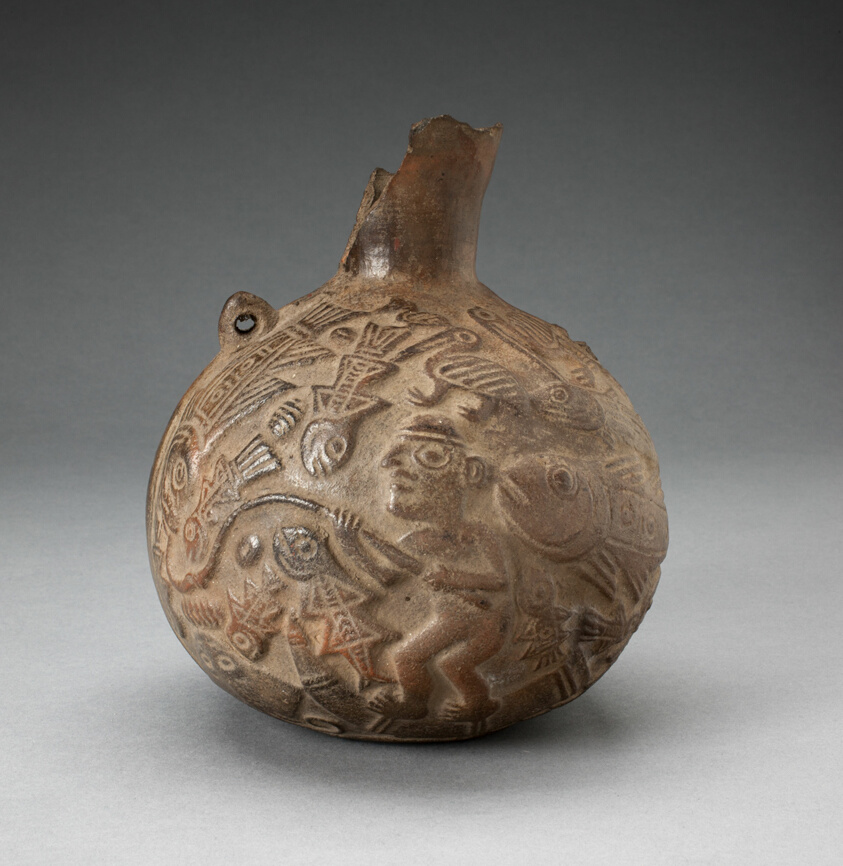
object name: Vessel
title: Jug with Relief Depicing Fishing Scene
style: moche, Arts of the Americas, andes, south american, andean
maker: Moche (Chimbote, Santa Valley, north coast, Peru)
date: 100 BCE–500 CE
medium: Ceramic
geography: Peruvian North Coast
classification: earthenware; art of the americas; ceramics; vessel